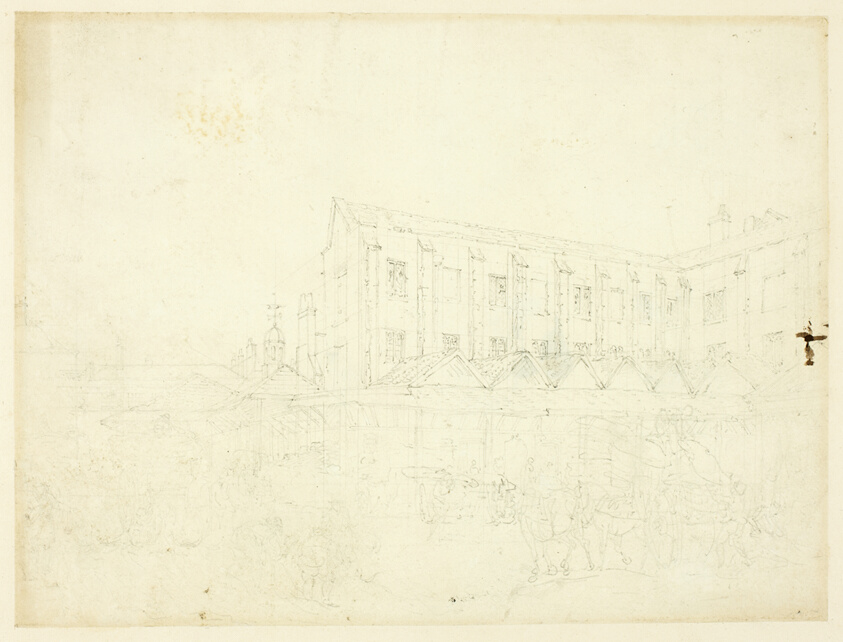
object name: Drawing and Watercolor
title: Study for Leaden Hall Market, from Microcosm of London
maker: Augustus Charles Pugin (English, born France, 1762-1832); Thomas Rowlandson (English, 1756-1827)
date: c. 1809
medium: Graphite on ivory wove paper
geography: England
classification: graphite; drawings (visual works); prints and drawing